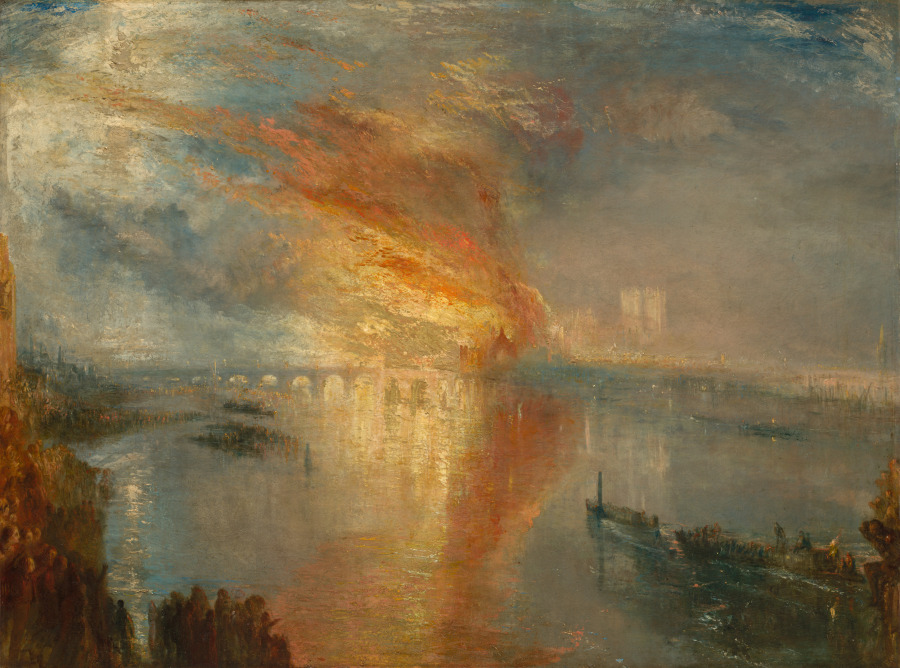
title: The Burning of the Houses of Lords and Commons, 16 October 1834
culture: England, 19th century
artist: Joseph Mallord William Turner (British, 1775–1851)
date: 1835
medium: oil on canvas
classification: Painting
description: Fire consumed London’s famous Houses of Parliament on the night of October 16, 1834, and people gathered along the banks of the river Thames to gaze in awe at the horrifying spectacle. Initially, a low tide made it difficult to pump water to land and hampered steamers towing firefighting equipment along the river. The blaze burned uncontrollably for hours. J. M. W. Turner records the struggle as the boats in the lower-right corner head toward the flames. Although Turner based the painting on an actual event, he magnified the height of the flames, using the disaster as the starting point to express man’s helplessness when confronted with the destructive powers of nature. Brilliant swathes of color and variable atmospheric effects border on abstraction.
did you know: Turner painted two versions of this event. Cleveland's painting views the fire downriver, from the southeast bank of the Thames, while the second version at the Philadelphia Museum of Art views the fire from directly across Westminster Bridge.